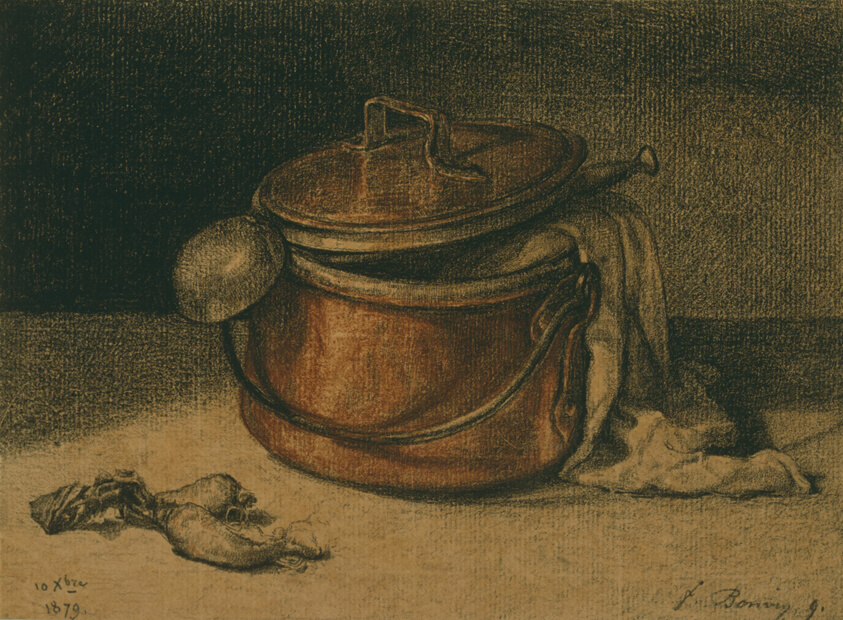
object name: Drawing and Watercolor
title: Still Life with a Copper Pot and Ladle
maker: François Bonvin (French, 1817-1887)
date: October 10, 1879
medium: Black and red chalk with traces of incising on tan laid paper, laid down on tan wove paper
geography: France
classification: prints and drawing; chalk; drawings (visual works)